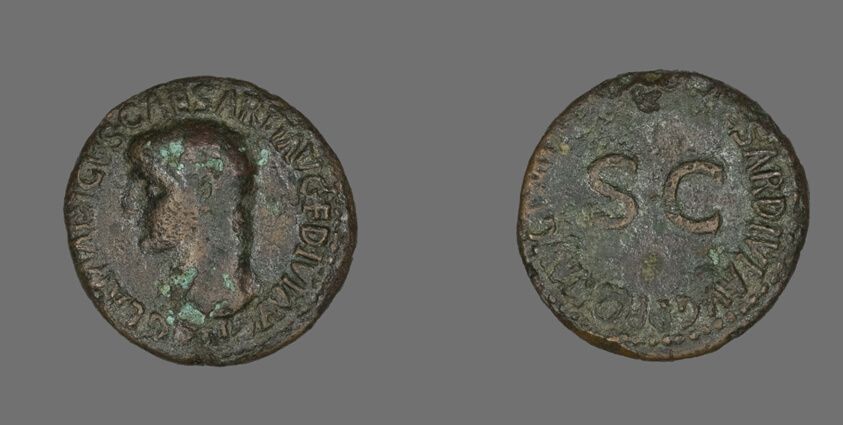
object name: Coin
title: As (Coin) Portraying Germanicus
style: roman (ancient, style or period)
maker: Roman, minted in Rome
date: 39-41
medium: Bronze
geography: Roman Empire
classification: coin; ancient art